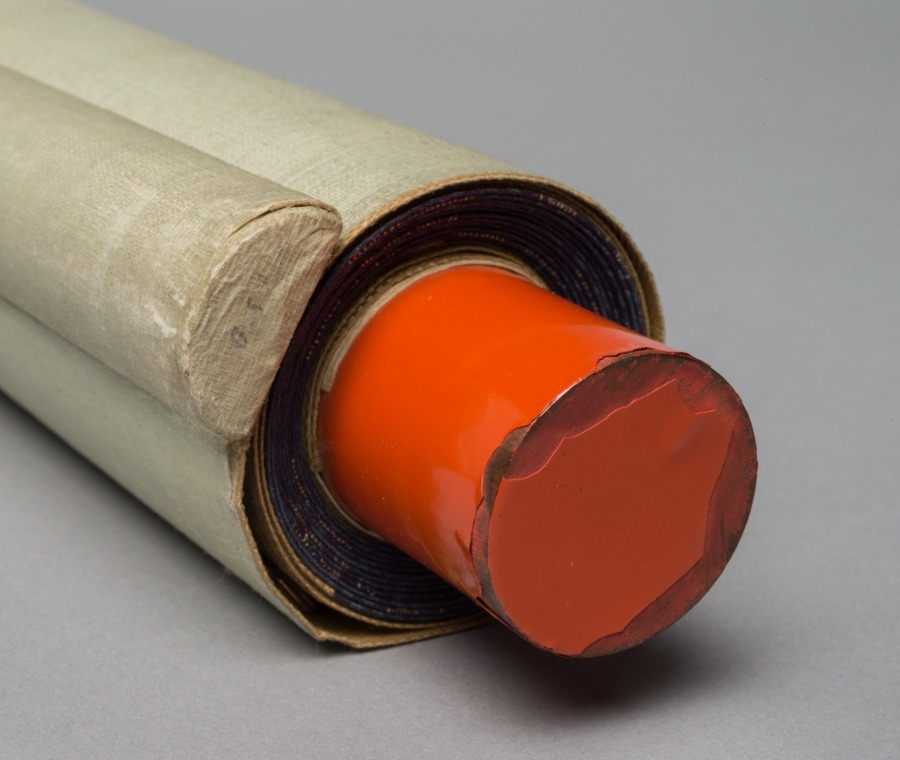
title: Woman and Two Children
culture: Japan, Meiji period (1868–1912)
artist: copy after Kubo Shunman (Japanese, 1757–1820)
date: early 1900s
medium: hanging scroll; color and gold on silk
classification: Painting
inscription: signed Kubo Shunman